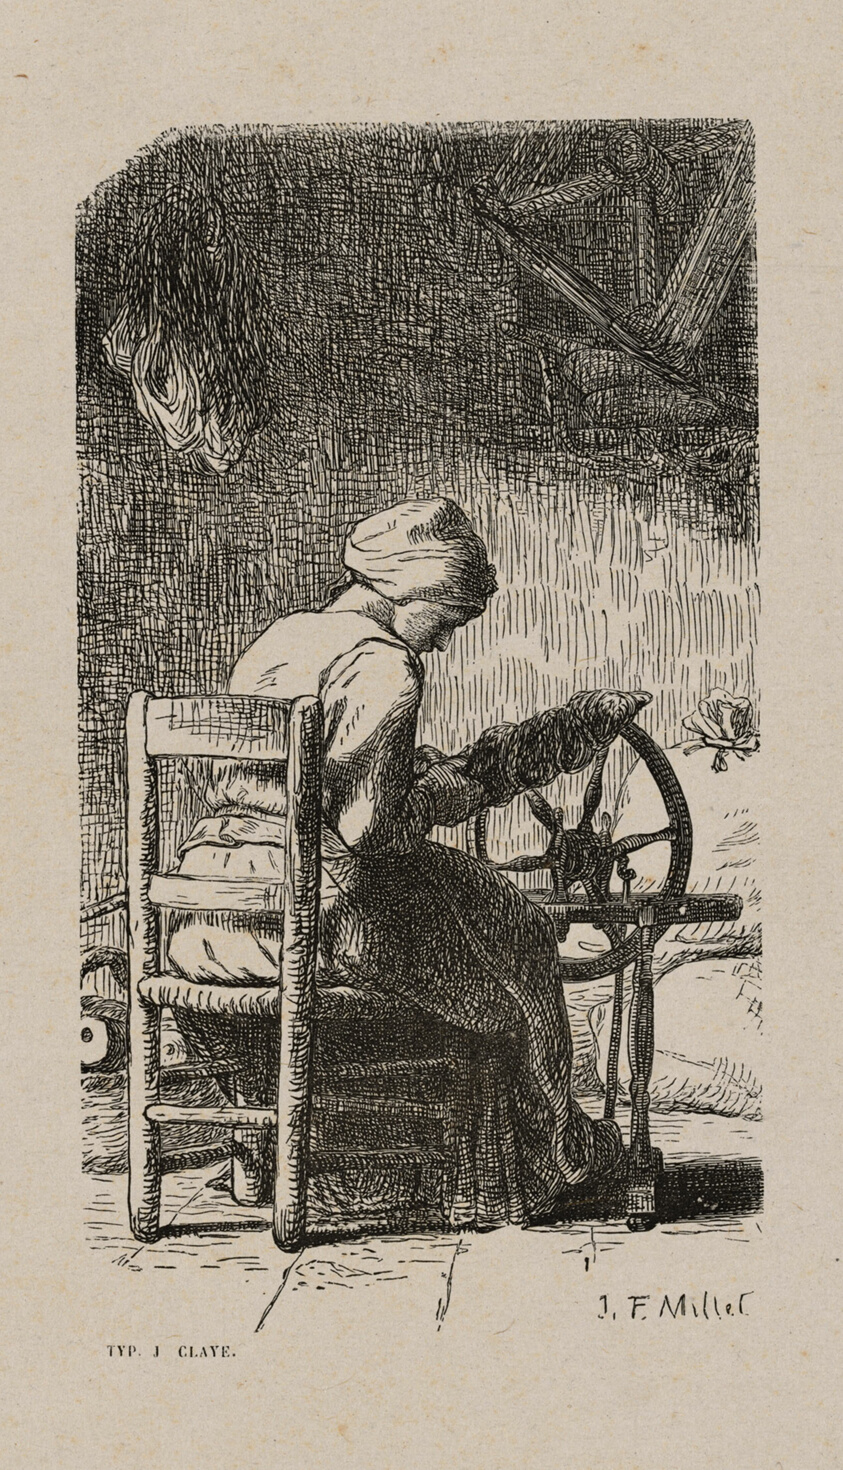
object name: Print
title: Woman Spinning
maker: Jacques Adrien Lavieille (French, 1818-1862); after Jean François Millet (French, 1814-1875); printed by Jules Claye (French, 1806-1886)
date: 1853, after drawing made in 1852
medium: Wood engraving in black on gray China paper, laid down on ivory wove paper (chine collé)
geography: France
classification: wood engraving; print; prints and drawing